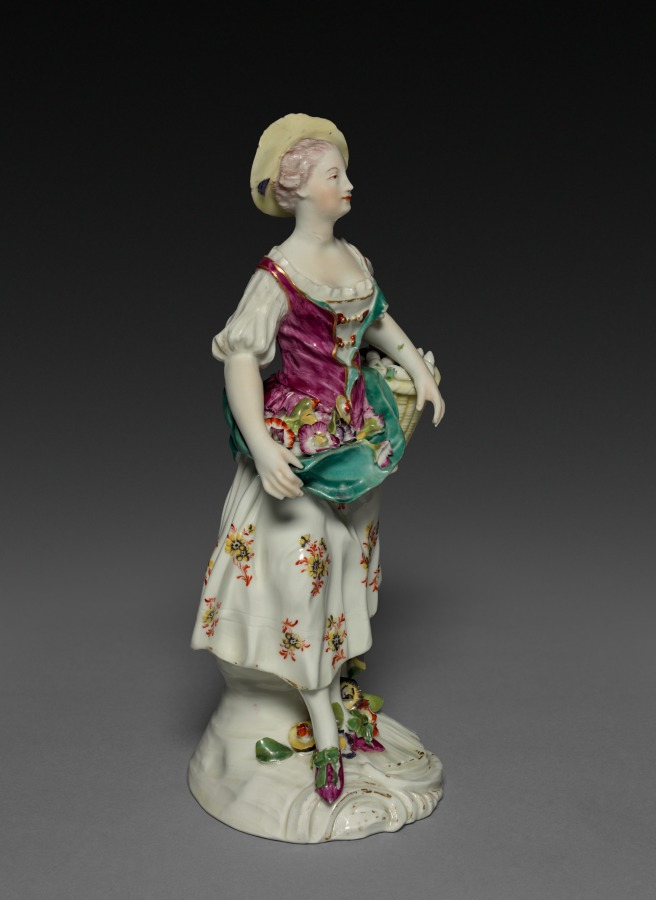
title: Farmer's Wife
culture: England, Derby, mid-18th century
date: 1760–1765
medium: soft-paste porcelain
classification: Ceramic